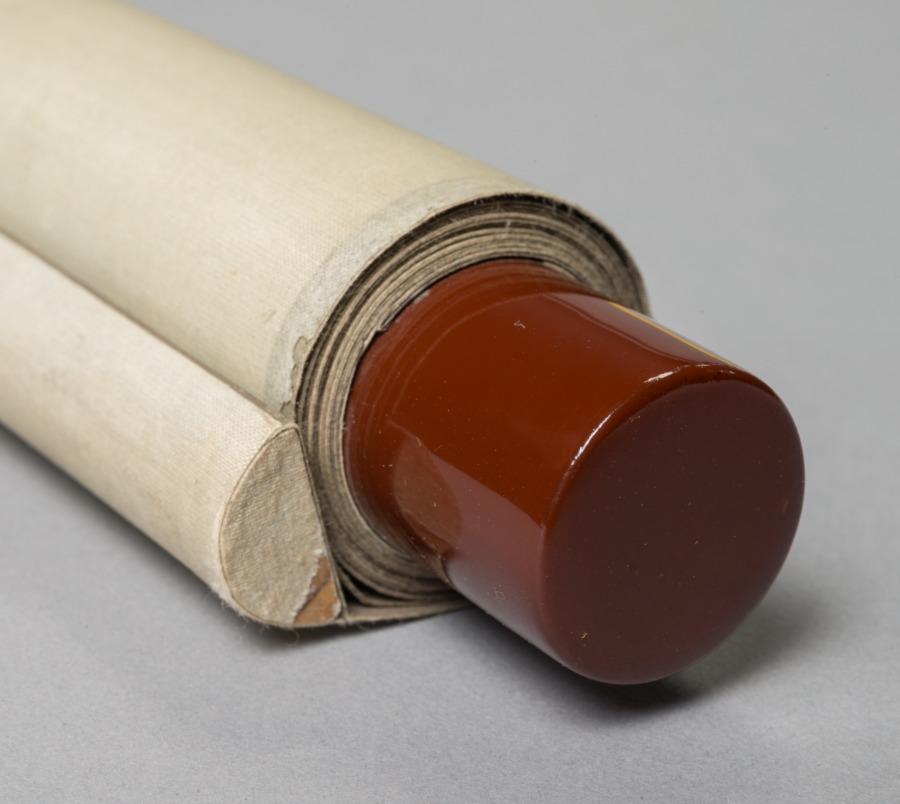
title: Sake Party with No Light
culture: Japan, Meiji period (1868–1912) to Taishō period (1912–26)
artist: Tomioka Tessai (Japanese, 1836–1924)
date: late 1800s–early 1900s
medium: hanging scroll; ink on paper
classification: Painting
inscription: Artist's signature and seal at left side; title at top left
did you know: Three skeletons are holding cups and passing around a bottle of sake.